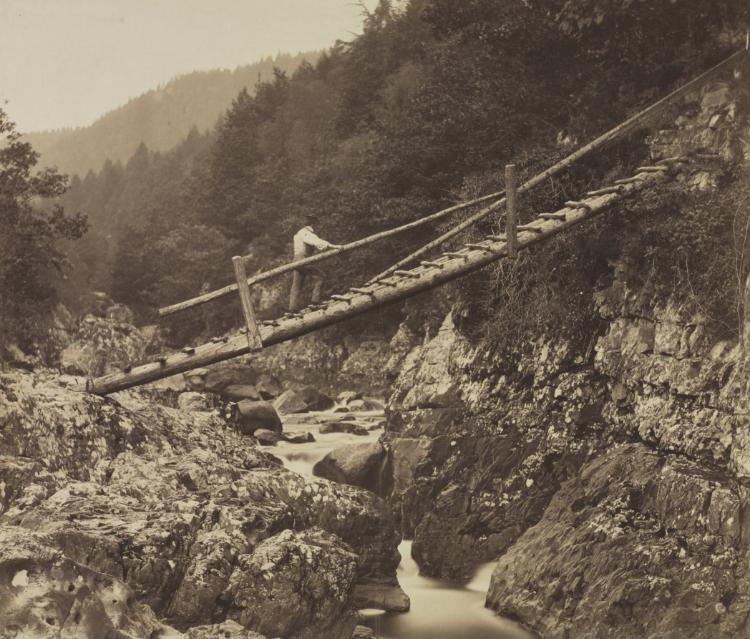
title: The Miners' Bridge, on the Llugwy, North Wales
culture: England, 19th century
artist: Roger Fenton (British, 1819–1869)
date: 1857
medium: albumen print from wet collodion negative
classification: Photograph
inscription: Written in pencil on verso: "BOB MINERS"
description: Roger Fenton was a versatile and prolific artist who abruptly ended his brief, 12-year career as a professional photographer to return to the practice of law. Nevertheless, his architectural and landscape photographs have brought him recognition as the greatest British photographer of the 1850s. In this picturesque scene, Fenton focused on a single figure ascending a precarious wooden bridge that hangs suspended between two craggy surfaces. He often included people in his photographs to indicate scale and to enliven the composition. Fenton's wet collodion negative rendered the texture of the riverbed in minute detail, transforming the dark tones of the rocks and the random pattern of the light-colored lichens into a lively, abstract design. The slow speed of the negative, relative to the swift movement of the stream, turned the rushing water into a dense, white cloud.